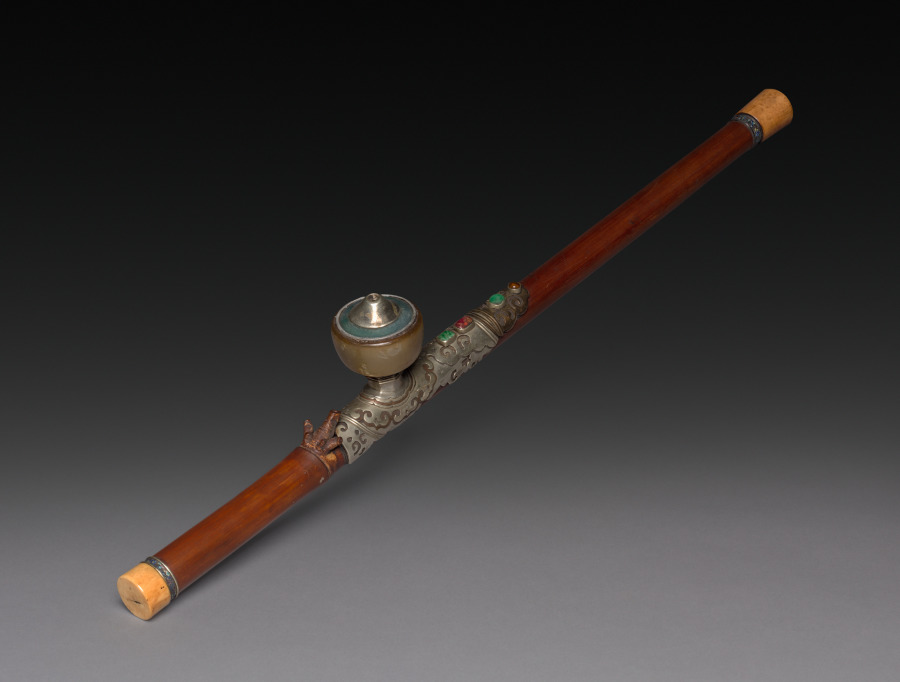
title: Opium Pipe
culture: China, Qing dynasty (1644-1911)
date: 1800s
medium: wood, ivory and silver and enamel ferrules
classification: Miscellaneous